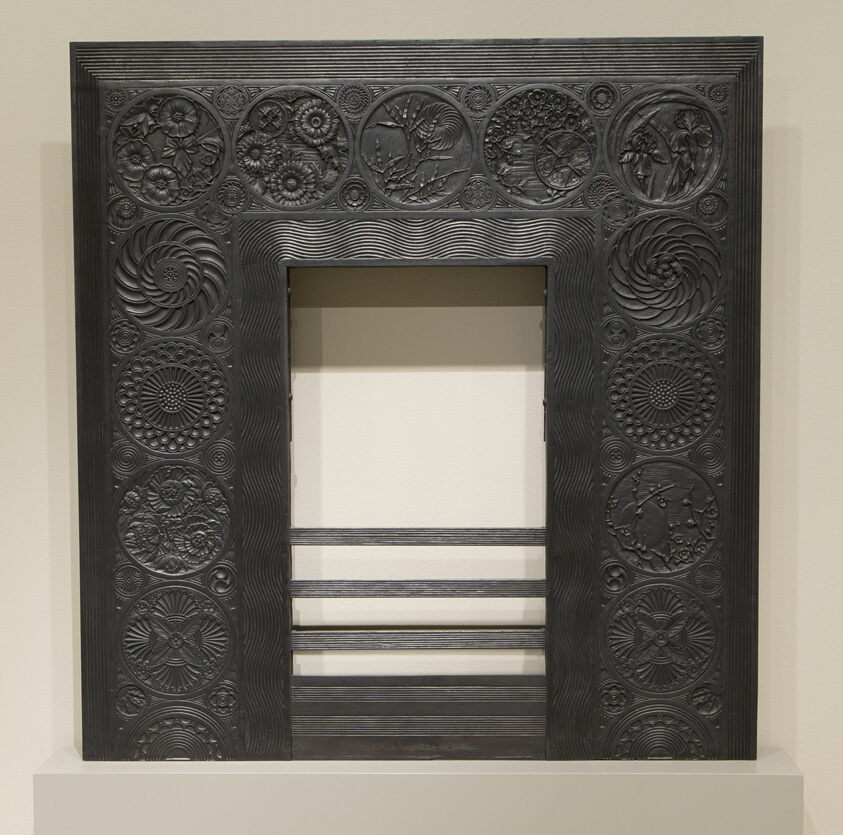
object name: Metalwork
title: Fireplace Surround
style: Japanism, japonism, design reform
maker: Designed by Thomas Jeckyll (English, 1827-1881); Made by Barnard, Bishop & Barnards (Norwich, England, 1826-1908)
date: c. 1875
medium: Cast iron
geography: Norwich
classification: ironwork; decorative arts; metalwork; fireplace equipment; hearth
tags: fire, heater, Japanese, Japanese mon